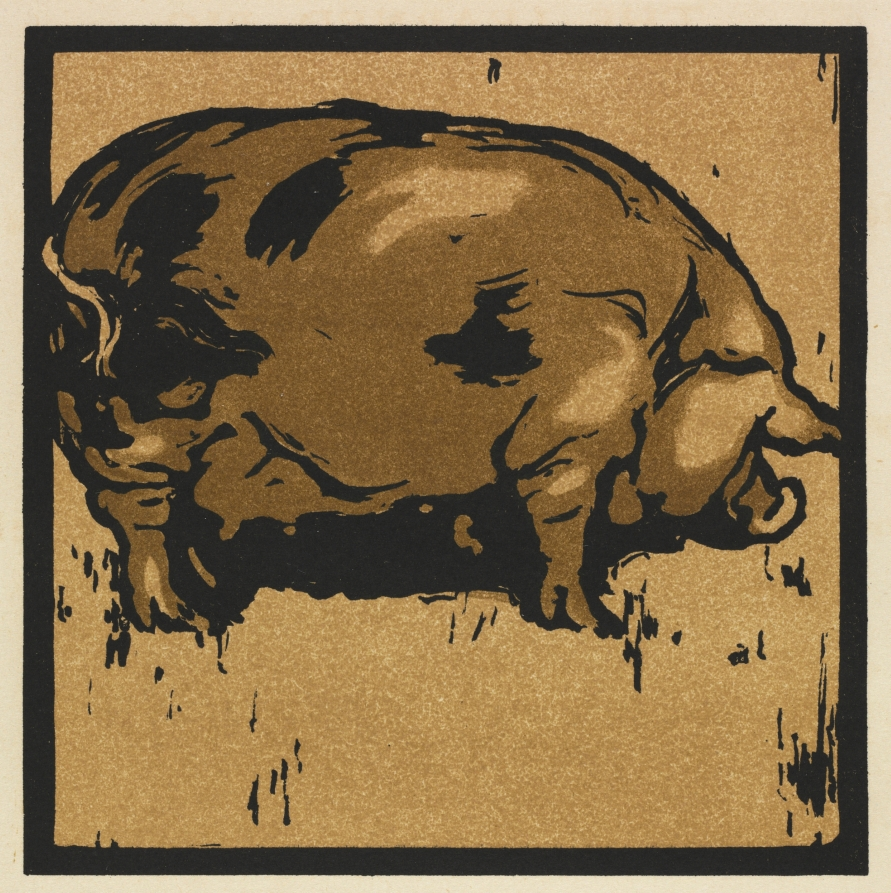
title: The Square Book of Animals: The Learned Pig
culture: England, 19th century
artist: William Nicholson (British, 1872–1949)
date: 1899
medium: color lithograph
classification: Print